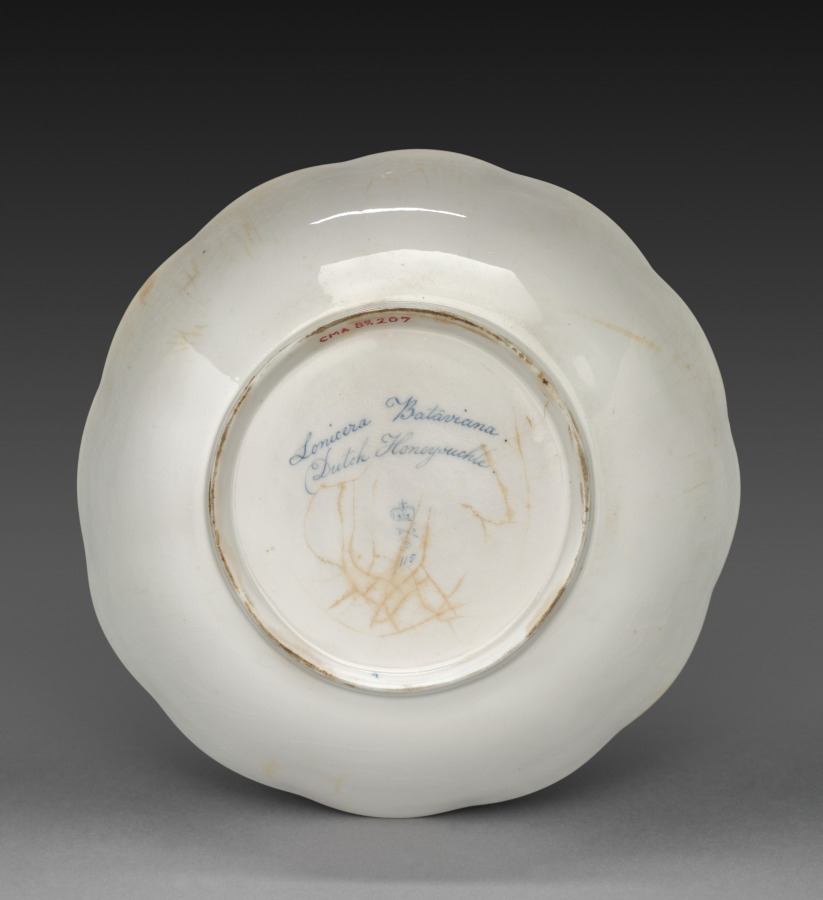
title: Bowl from Dessert Service: Dutch Honeysuckle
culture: England, Derby, 18th century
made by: Derby (Crown Derby Period) (British)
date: c. 1800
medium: porcelain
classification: Ceramic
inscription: inscribed in blue on back: Lonicera Bataviana./Dutch Honeysuckle./crown/crossed batons and dots/D/115. Near edge: 9.